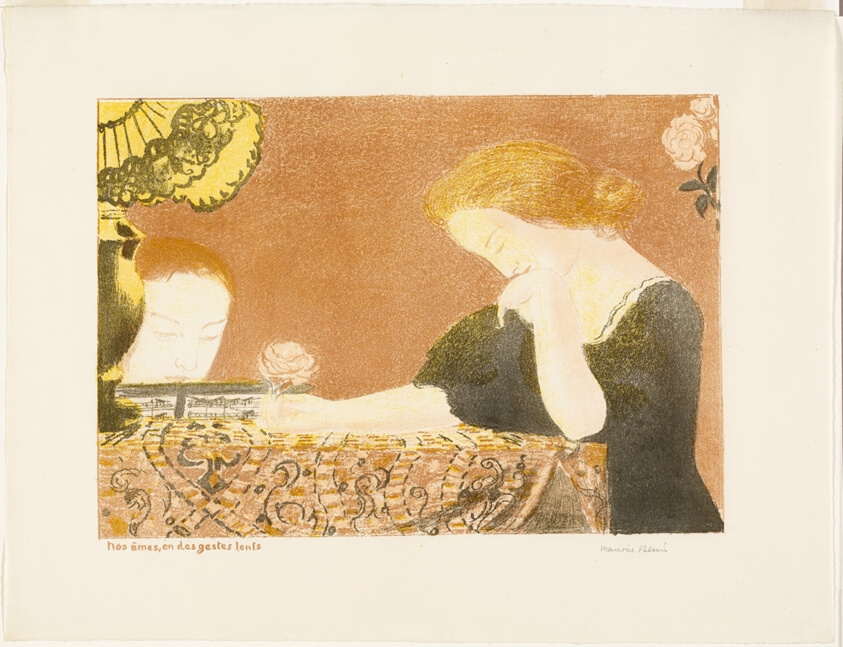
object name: Print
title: Our Souls, in Languorous Gestures, plate nine from Love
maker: Maurice Denis (French, 1870-1943); published by Ambroise Vollard (French, 1867-1939)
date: 1898, published 1899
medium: Lithograph in pale pink, slate gray, red-brown, and yellow on light ivory wove paper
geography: France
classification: lithograph; print; prints and drawing